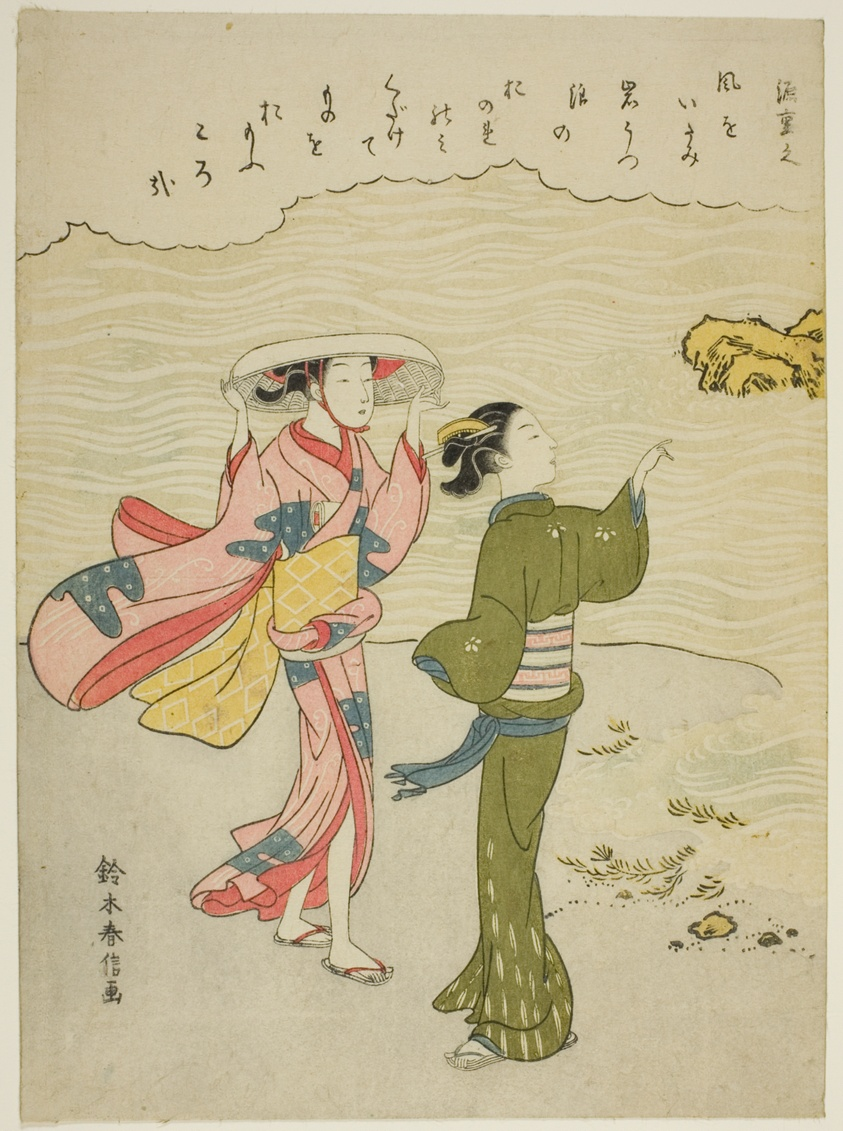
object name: Print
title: Minamoto no Shigeyuki, from an untitled series of Thirty-Six Immortal Poets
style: Japanese (culture or style)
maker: Suzuki Harunobu 鈴木 春信; Japanese, 1725 (?)-1770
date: c. 1767/68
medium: Color woodblock print; chuban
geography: Japan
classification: woodblock print; print; asian art